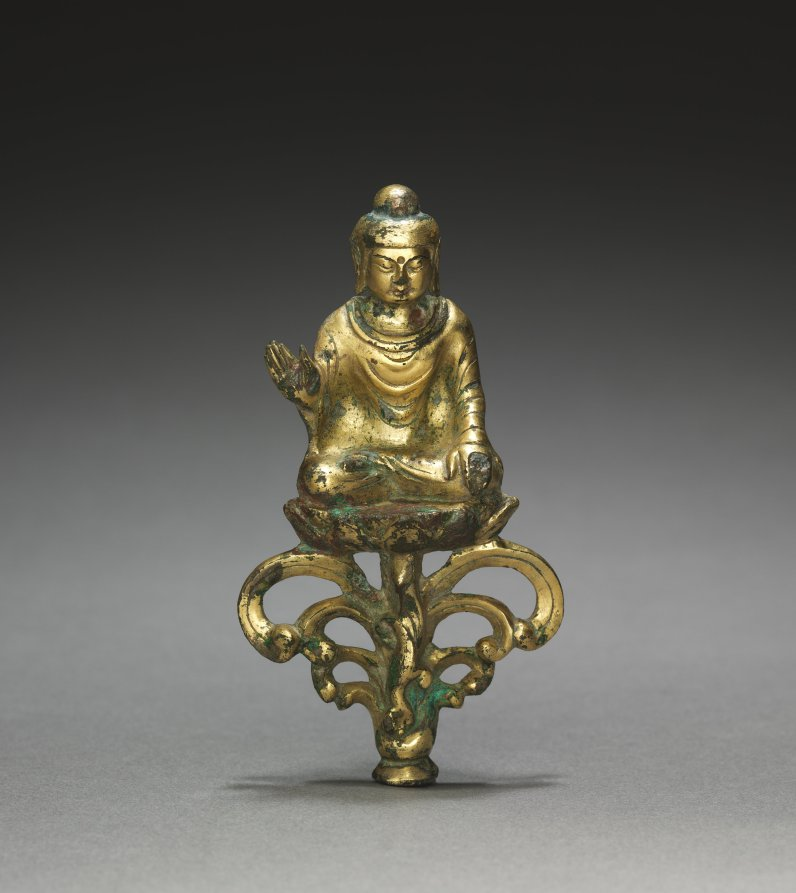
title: Seated Buddha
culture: China, Tang dynasty (618-907)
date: 600s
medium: gilt bronze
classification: Sculpture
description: Portable Buddhist figures and objects like this gilt bronze had a variety of uses. They could have been carried in religious processions. Others could serve as donations, souvenirs, or votive items in the context of pilgrimages to religious sites. Their miniature size also made them appropriate for placement on private altars or shrines for personal devotion.